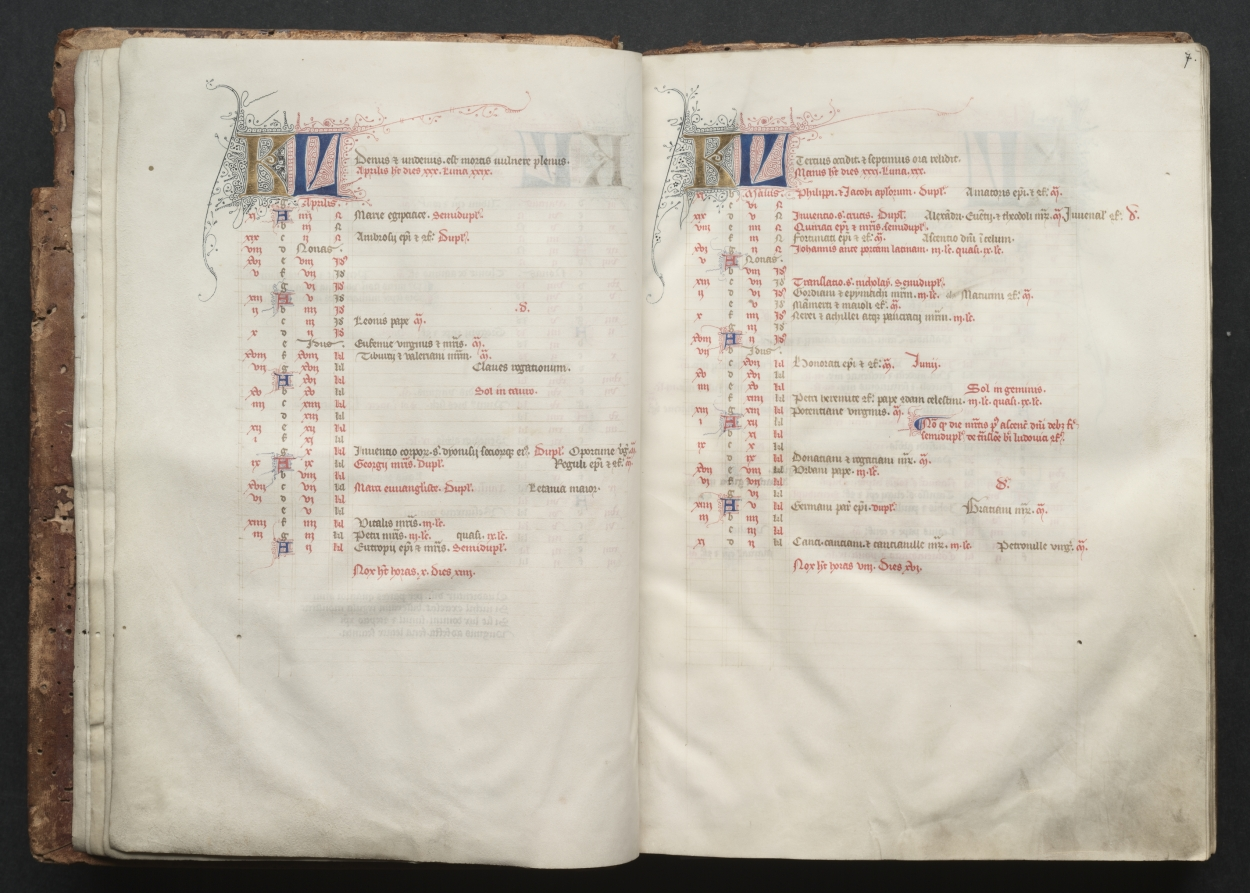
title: The Gotha Missal: Fol. 6v, Text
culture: France, Paris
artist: Master of the Boqueteaux (French)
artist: and Workshop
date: c. 1375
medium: ink, tempera, and gold on vellum; blind-tooled leather binding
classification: Bound Volume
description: The style and quality of this manuscript's decoration is typical of deluxe Parisian books made for aristocratic or royal patrons. Most of the book's decoration appears to be the work of the Master of the Boqueteaux, an artist active at the court of King Charles V (died 1380). His style was apparently shared by a number of book illuminators working in and around Paris. It is very possible that the Gotha Missal belonged to Charles V, but is not provable because the manuscript has no royal portraits and lacks a colophon. Given the book's magnificent decoration, however, it would seem that it was produced for a Valois prince, if not for the king himself. The manuscript receives its name from the German dukes of Gotha, its later owners.